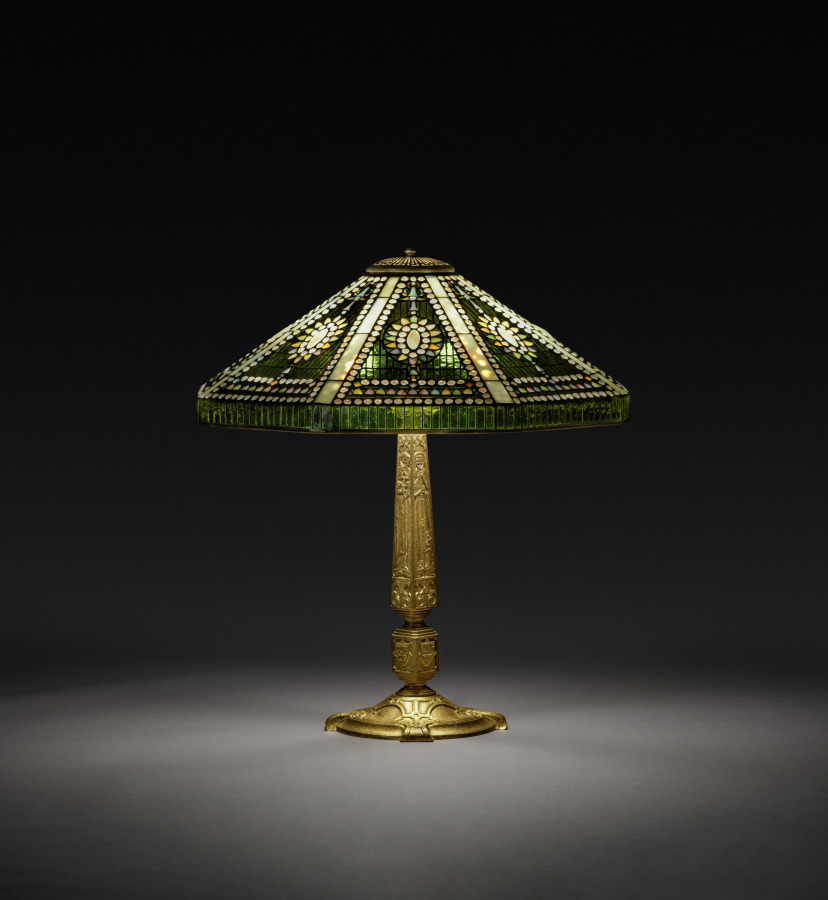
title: Empire Table Lamp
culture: America, New York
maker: Tiffany Studios (United States, New York, 1902–32)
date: c. 1902–10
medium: Leaded glass, gilt bronze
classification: Lamp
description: Although Tiffany often wrote of his disdain for romanticizing the past, he recognized that many of his customers favored historical styles. He kept his showrooms well stocked with colonial revival furniture and lamps, such as the Napoleon-inspired Empire pattern, with its abstracted neoclassical swags and medallions, that fit easily within traditional decor.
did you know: The row of little green glass tiles at the bottom edge of this shade is meant to resemble a row of silk fringe.